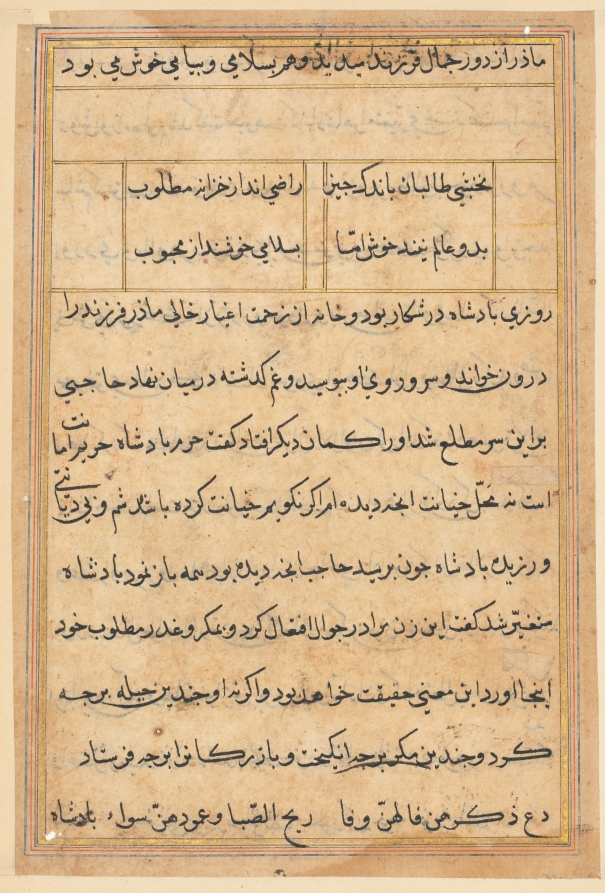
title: Page from Tales of a Parrot (Tuti-nama): text page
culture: Mughal India, court of Akbar (reigned 1556–1605)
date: c. 1560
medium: gum tempera, ink, and gold on paper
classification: Painting